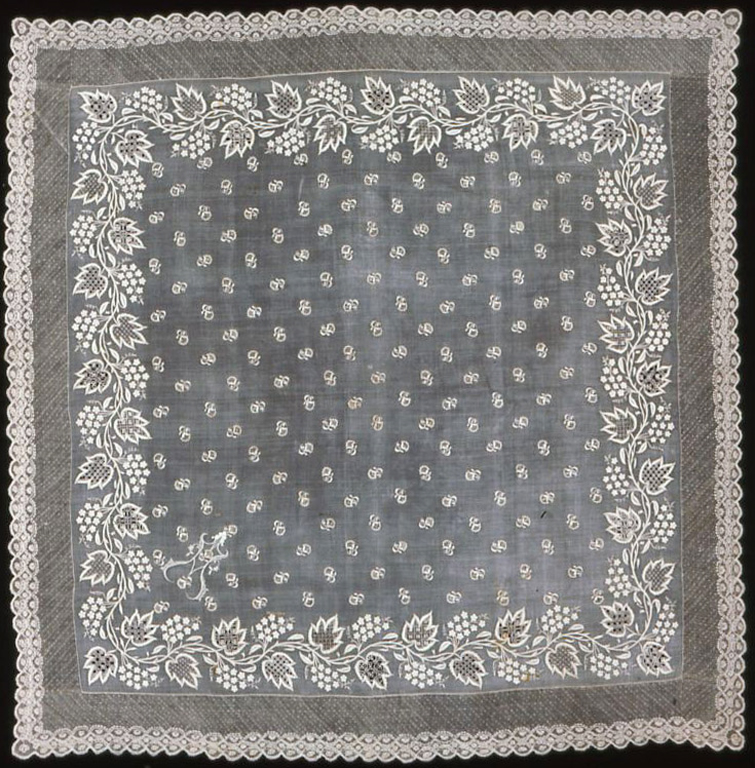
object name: Costume and Accessories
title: Shawl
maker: Philippines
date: c. 1840/50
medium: Pineapple fiber, plain weave (pina cloth), cut and drawnwork embroidered with cotton in cloth, cross, darned points, darned squares, darned wheels, darning, interlocking, overcast, Roman, single faggot, tulle, and twined double running stitches; embroidered with cotton in overcast, raised stem, satin, and twinwed double running stitches; couching; edged with cotton, needle-made edging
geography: Philippines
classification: textile; weaving; costume accessory; costume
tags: fashion